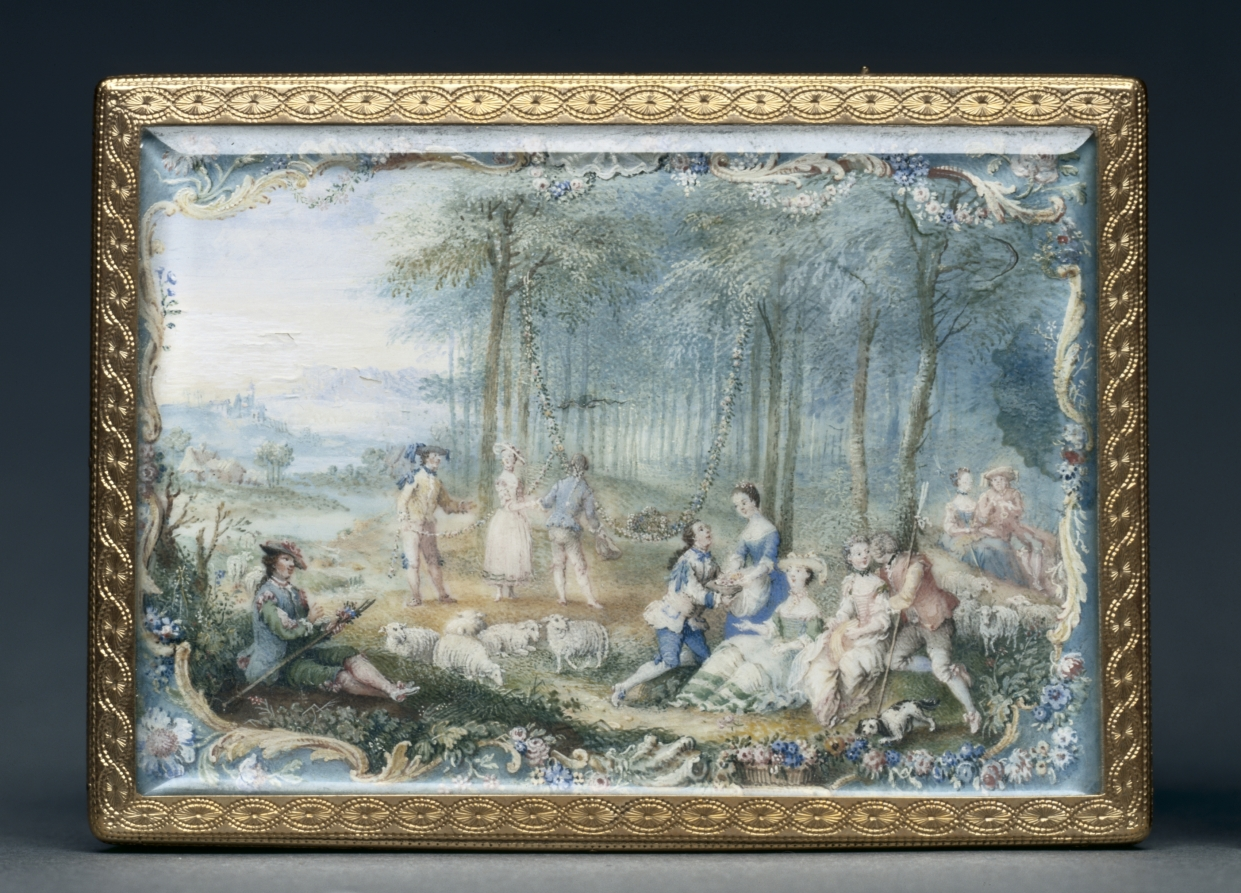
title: Snuff Box (Tabatière)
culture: France, 18th century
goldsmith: Jean Ducrollay (French, 1709–1787)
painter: Louis Nicolas van Blarenberghe (French, 1716–1794)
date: 1753–54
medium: gold and glass with miniatures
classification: Metalwork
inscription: [Maker's mark of Jean Ducrollay, master goldsmith in 1734, inside cover; bottom; right side]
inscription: [Charge mark of Julien Berthe, Paris, 1750-1756, inside cover; bottom; right side]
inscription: [Discharge mark of Julien Berthe, Paris, 1750-1756, on bezel]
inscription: [Inscribed on miniature, front side]: "V.[an] Blarenberghe/1753"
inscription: [Warden's mark for Paris, 1763-1754, inside cover; bottom; right side]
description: In 18th-century France ornately enameled boxes that held snuff—powdered tobacco—became a popular accessory in the French court. This object’s rectangular shape differs from early work attributed to Jean Ducrollay. Though the light colors, floral borders, and depictions of lively outdoor recreation are representative of earlier rococo imagery, the rectangular shape and simple frieze make it a primary example of rising neoclassicism.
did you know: The Ducrollay family was one of the most sought-after Parisian goldsmith workshops under the reign of French King Louis XV.